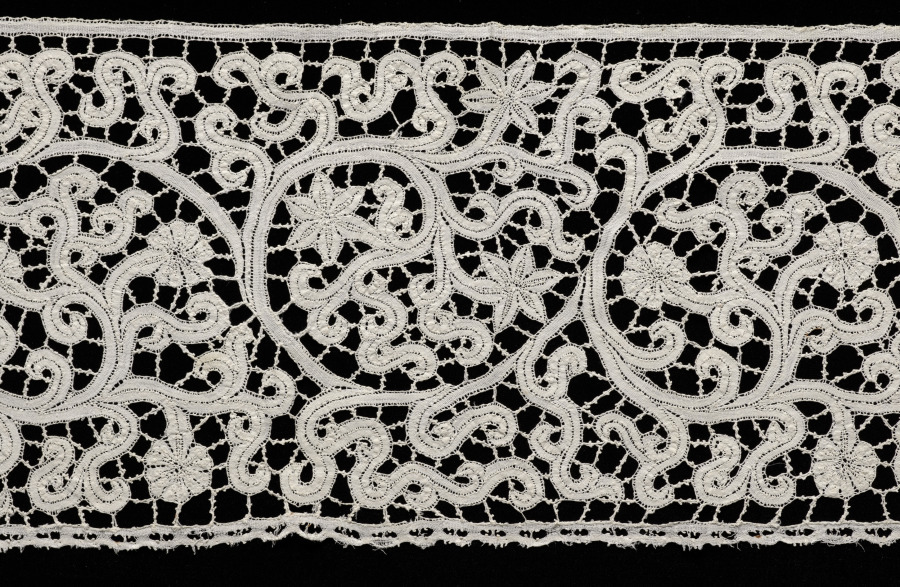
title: Lace Border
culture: Italy, Milan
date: 1600s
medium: Bobbin lace (Punto di Milano)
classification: Lace